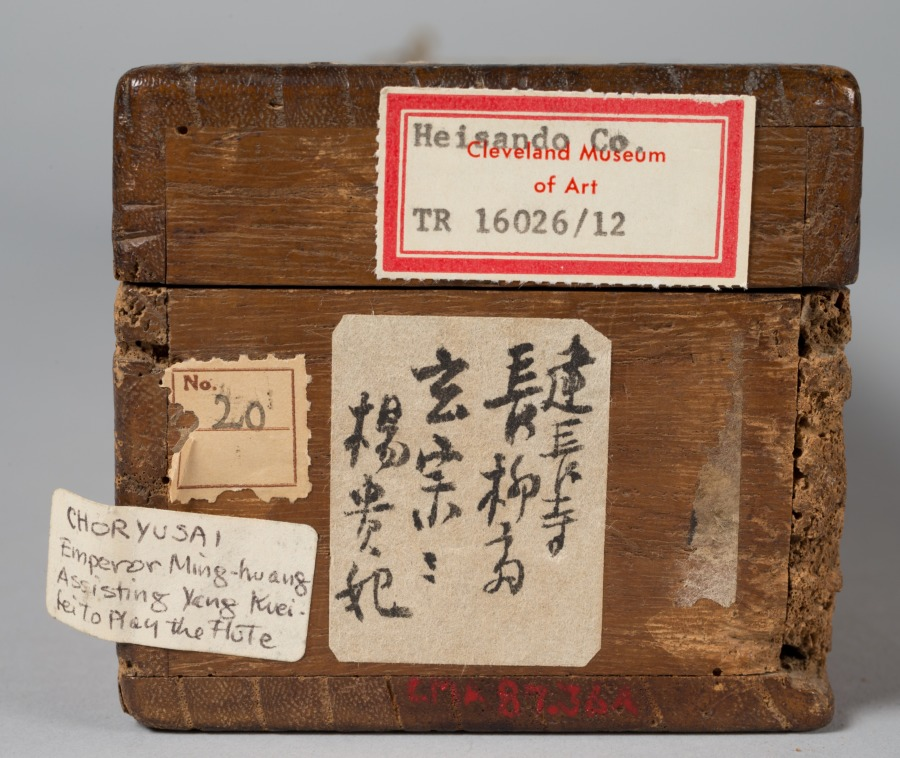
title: Emperor Minghuang Teaching Yang Gueifei to Play the Flute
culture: Japan, Muromachi period (1392–1573)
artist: Choryusai (Japanese)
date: late 1400s–early 1500s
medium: hanging scroll; ink and color on paper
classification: Painting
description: Minghuang, a prominent emperor of Tang (618-906) China and his consort, Yang Gueifei, have inspired many legends, paintings, and poetry in later Chinese culture. Through the study of Chinese literature and the collecting of Chinese paintings, tales of their lives and romance became well-known in Muromachi Japan.